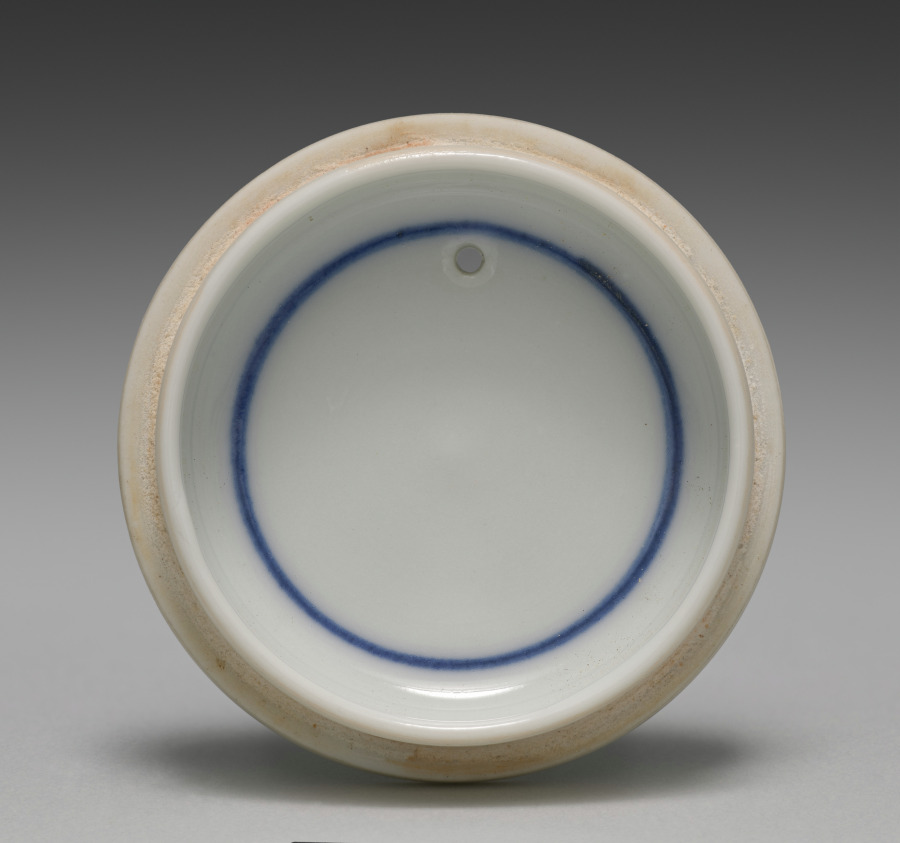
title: Lid for a Sake Pourer with Flowers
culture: Japan, Meiji period (1868–1912)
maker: Seifū Yohei III (Japanese, 1851–1914)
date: 1893–1914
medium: Porcelain with molded design, overglaze color enamel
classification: Ceramic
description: This sake pourer is of a type called a chōshi. It is elaborately decorated with flowers in overglaze enamels in several colors, including black for the contour lines of leaves and stems; orange, white, gold, and two shades of green for the peonies; and purple for the thistles. The white blossoms have been built up with white enamel, then incised for a white-on-white eect; the orange and purple use an absence of color to produce the contours of individual petals. Yohei III referred to his works in multicolor overglaze enamels as “hundred flower brocades” (hyakka nishiki). Two small nyoi (C. ruyi) staff-head motifs, molded in clay and applied to either side of the lid, create handle rests, as well as natural places for the thumb and index finger of one hand to rest, so one can both secure the lid and steady the pour, while the handles are held in the other hand. The top of a nyoi staff resembles the curled cap of the reishi. Such scepters are imagined to be found in the hands of sages, Daoist immortals, or Buddhist deities and connote lofty goings-on and favorable circumstances. Since this sake pourer is unsigned, it may have been made for imperial family members to give as a gift.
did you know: This sake pourer with purple thistles and orange peonies shows off Seifū Yohei III’s technique of enamels painted over the glaze.